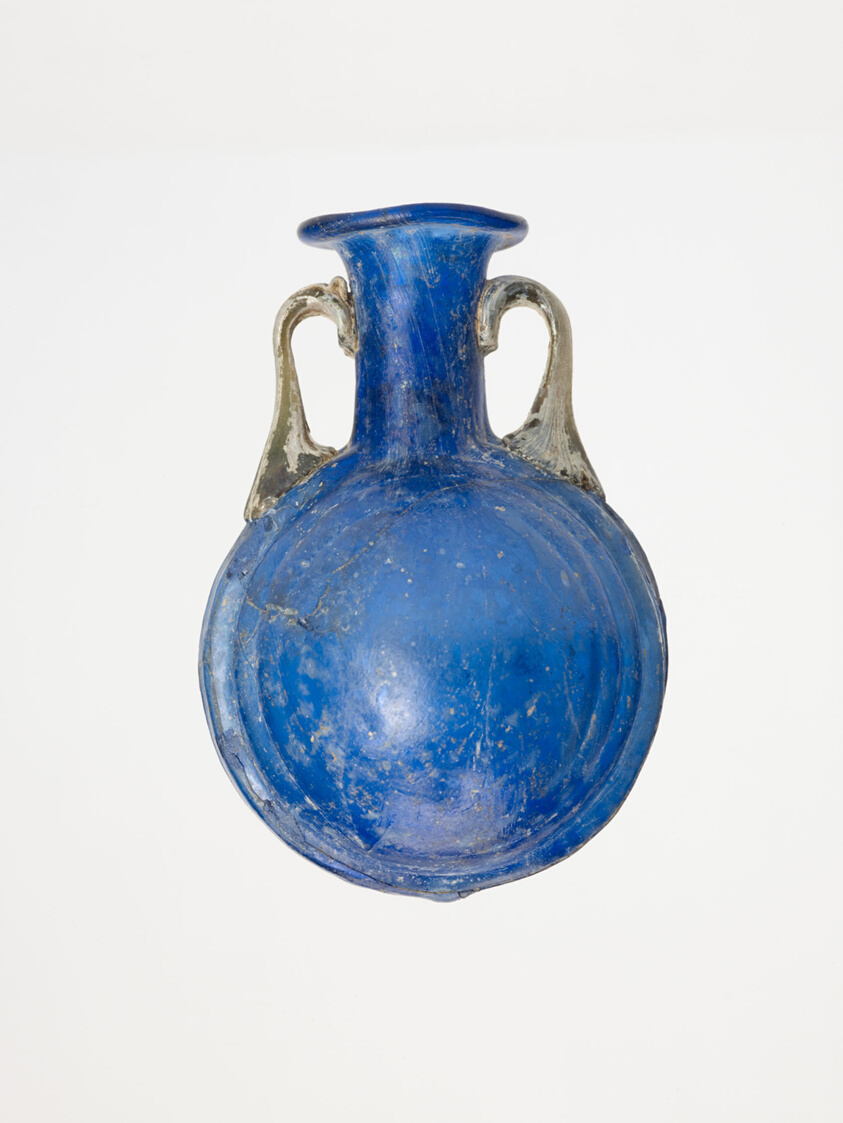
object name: Vessel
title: Bottle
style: roman (ancient, style or period), ancient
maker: Roman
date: 1st century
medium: Glass, mold-blown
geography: Roman Empire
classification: bottle; glass; vessel; ancient art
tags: bottles